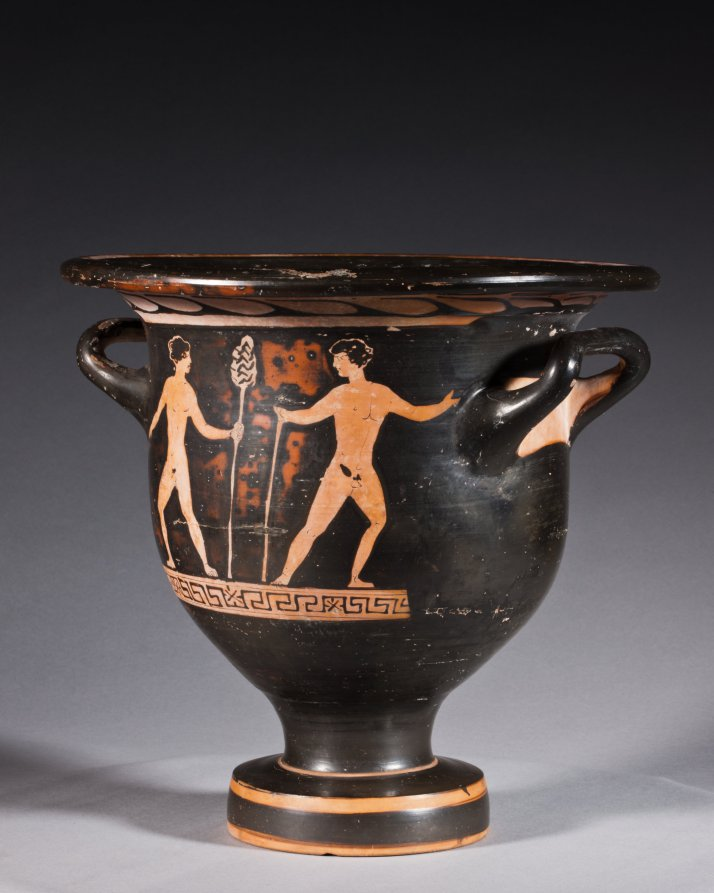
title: Red-Figure Bell Krater (Mixing Vessel): Aphrodite and Eros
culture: South Italian, Apulian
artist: attributed to Graz Painter (South Italian, Apulian, active c. 380–360 BCE)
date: c. 370–360 BCE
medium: ceramic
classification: Ceramic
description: This small mixing vessel shows a finely dressed woman seated on a chest and holding up a mirror to admire herself. Before her stands Eros, the winged god of love, holding a ribbon or sash. Behind the woman stands a pillar with the inscription ΑΦΡΟΔΙΤΗ, or APHRODITE, the goddess of love. Such labels are rare on vases, and scholars debate whether this names the woman shown as Aphrodite herself, with her son Eros, or a bride envisioning herself as Aphrodite, just before her wedding.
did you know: The dancing nude youths on the reverse are unusual; typically they would be standing and draped.